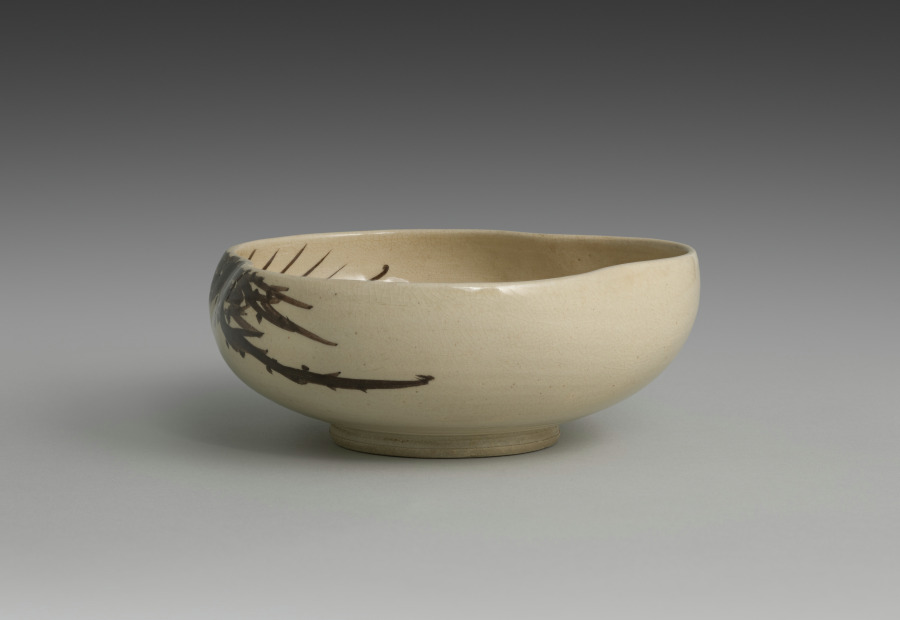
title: Pine-shaped Dish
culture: Japan, Meiji period (1868–1912)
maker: Seifū Yohei III (Japanese, 1851–1914)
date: 1893–1914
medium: Stoneware with underglaze iron oxide and crackled glaze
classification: Ceramic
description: The clever design on this stoneware Awata-style dish makes use of the interior and exterior surfaces to present a close-up view of pine needles on the branch painted in underglaze iron oxide. The branch is shown on the outside of one side of the dish, while the needles fan out across the inside. The entire dish, when seen from above, reveals a shape resembling the mushroom cap–like motif appearing in textile designs and in classical Japanese paintings called Yamato-e to represent pine trees.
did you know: Awata ware, named for the area of Kyoto where it was historically produced, is considered a subset of Kyoto ware. It is characterized by a very light brown body with a transparent crackled glaze.